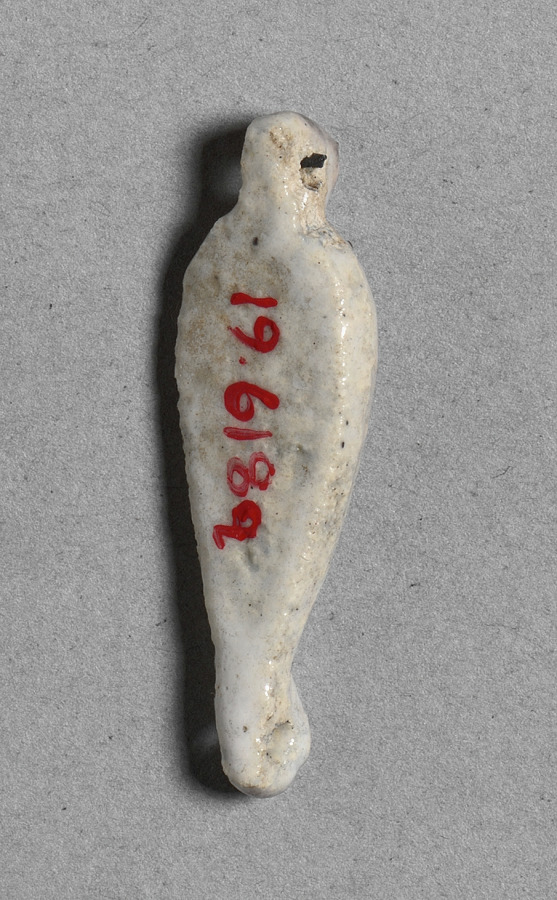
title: Petal-Shaped Bead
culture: Egypt, New Kingdom (1540–1069 BCE), Dynasty 18, reign of Amenhotep III (1390–1352 BCE)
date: c. 1391–1353 BCE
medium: faience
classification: Jewelry